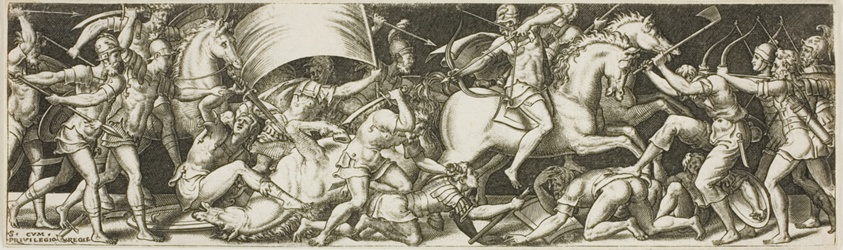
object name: Print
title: Battle of Cavaliers and Infantrymen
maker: Etienne Delaune; French, c. 1519-1583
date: 1550/1572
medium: Engraving on paper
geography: France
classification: engraving; print; prints and drawing